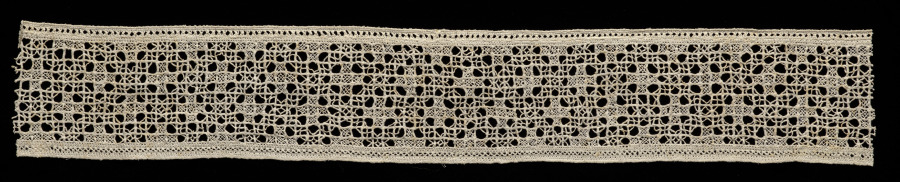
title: Lace Band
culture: Italy, 1800s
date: 1800s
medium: Linen: needle lace (Reticella) and drawnwork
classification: Lace